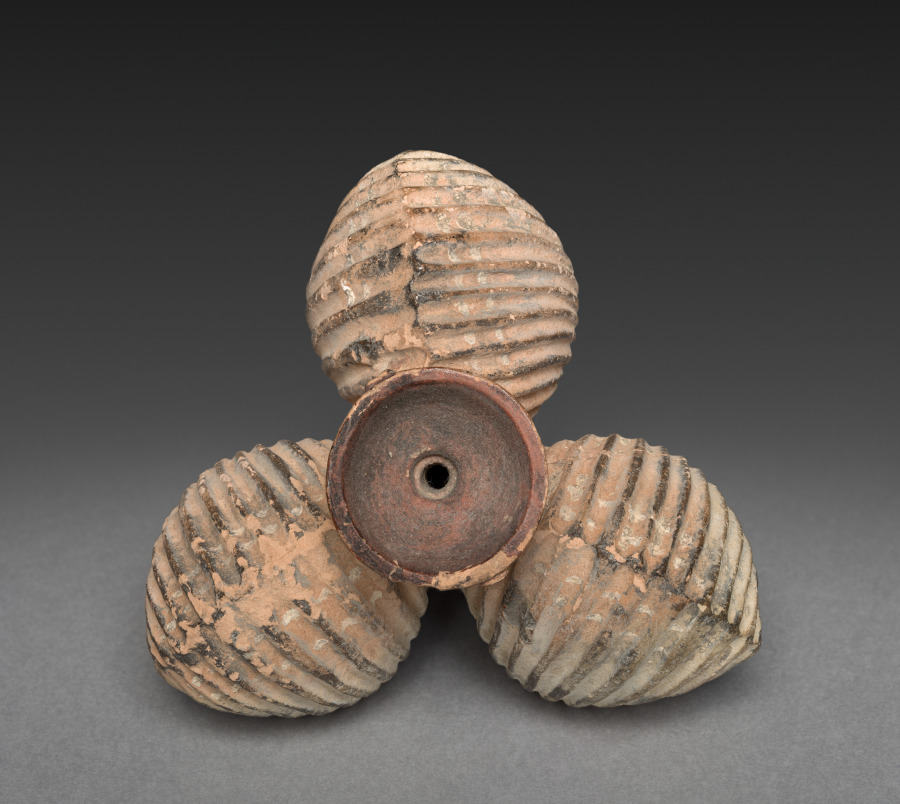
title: Cockleshell Aryballos (Oil Vessel)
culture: Greek, Attic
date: late 500s–early 400s BCE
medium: ceramic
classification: Ceramic